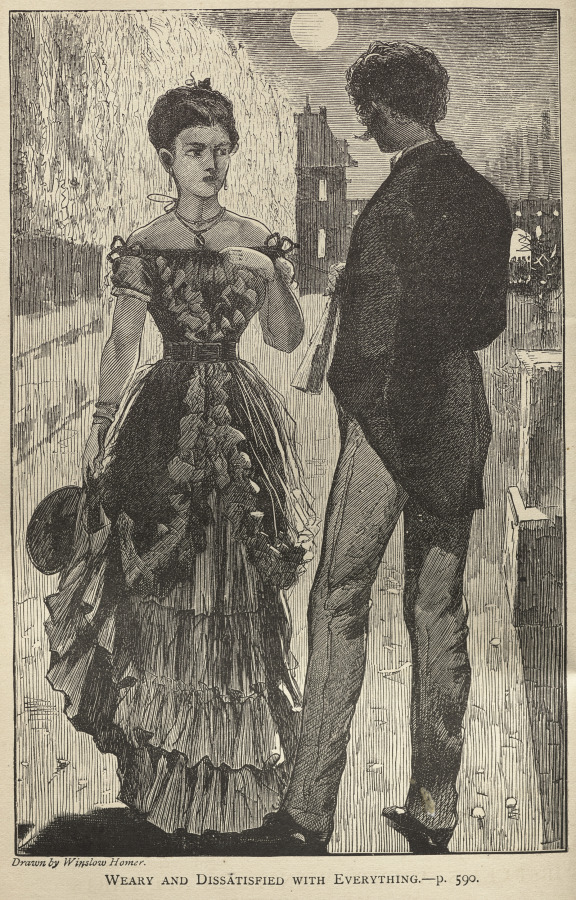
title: Weary and Dissatisfied with Everything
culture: America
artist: Winslow Homer (American, 1836–1910)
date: 1869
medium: wood engraving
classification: Print